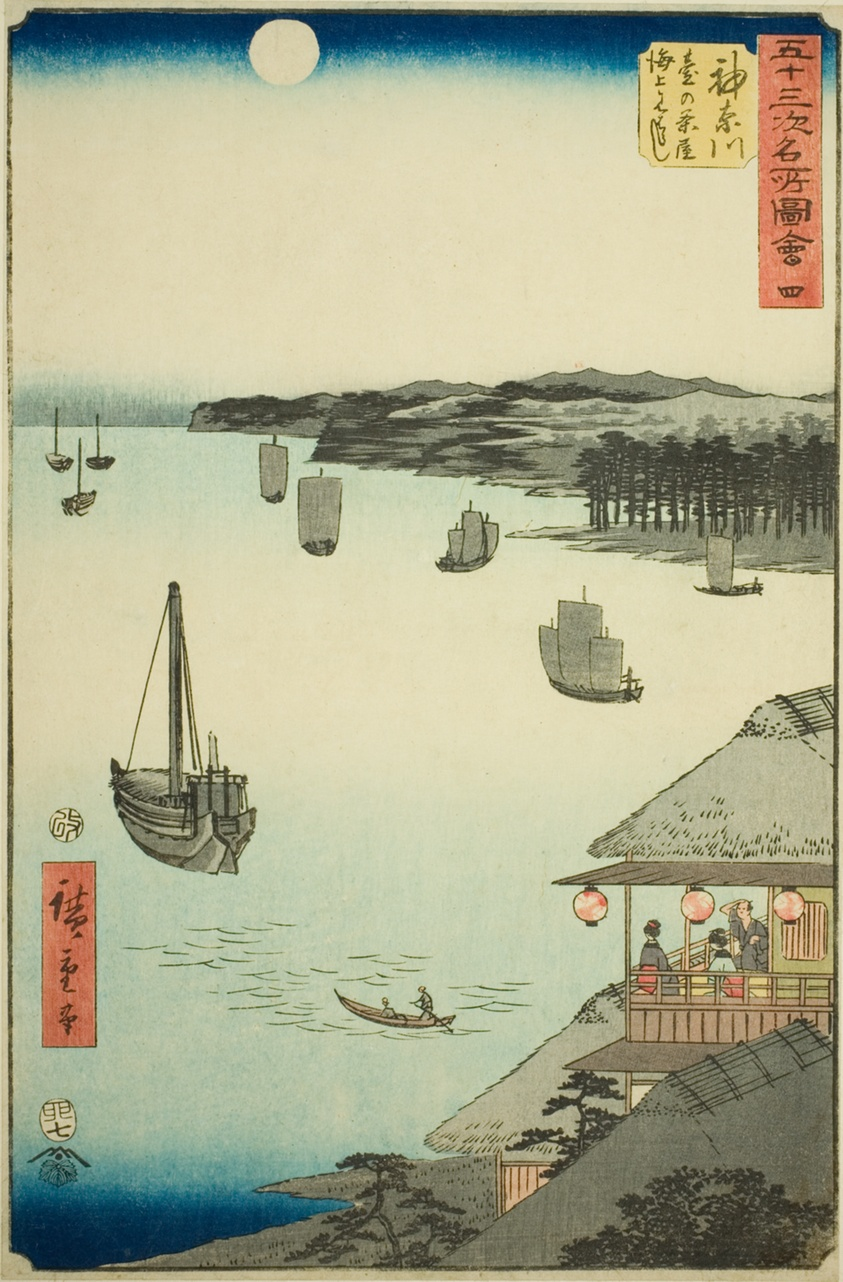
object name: Print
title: Kanagawa: View over the Sea from the Teahouses on the Hill (Kanagawa, dai no chaya kaijo miharashi), no. 4 from the series "Famous Sights of the Fifty-three Stations (Gojusan tsugi meisho zue)," also known as the Vertical Tokaido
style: Japanese (culture or style)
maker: Utagawa Hiroshige 歌川 広重; Japanese, 1797-1858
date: 1855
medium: Color woodblock print; oban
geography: Japan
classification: woodblock print; print; asian art